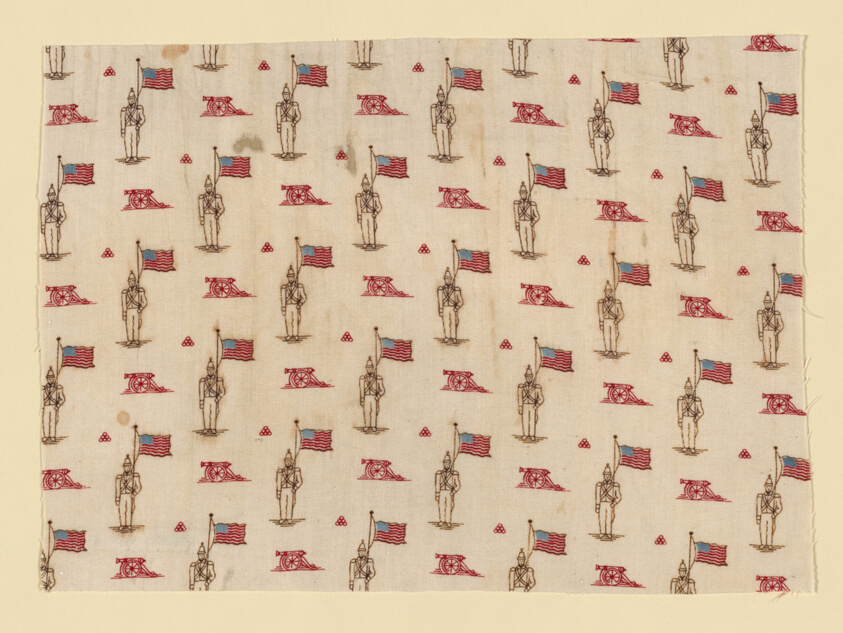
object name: Textile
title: Fragment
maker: United States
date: 1876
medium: Cotton, plain weave; roller printed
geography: United States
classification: textile; weaving - printed; furnishing textile